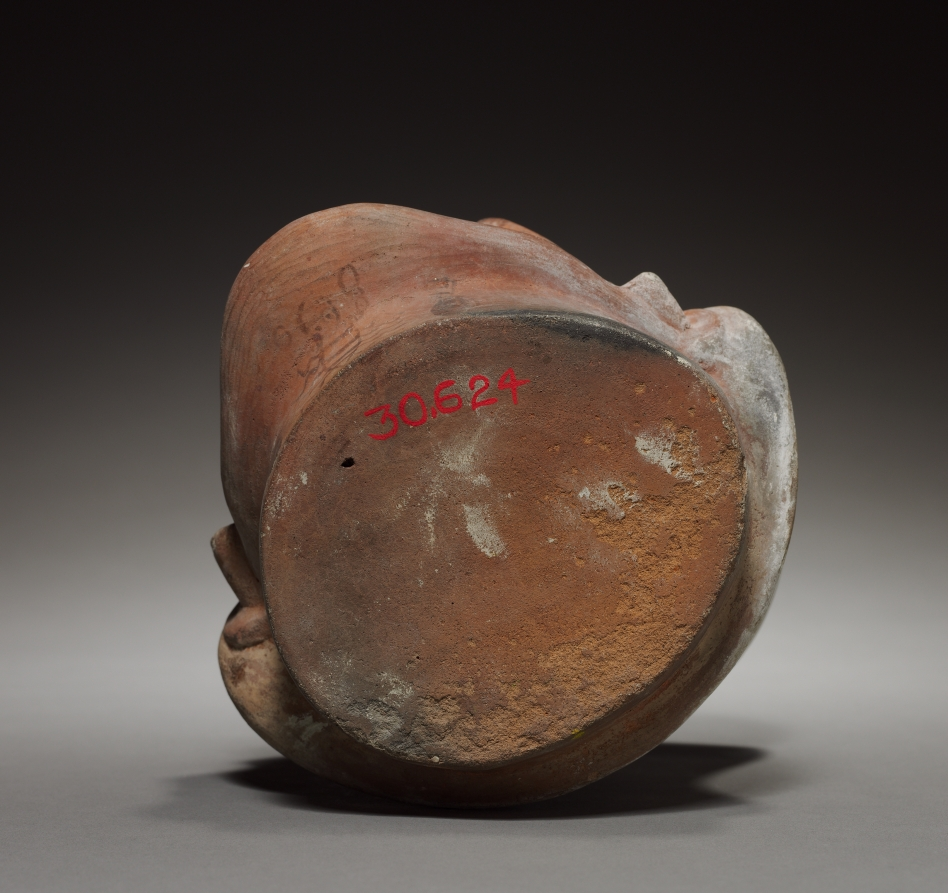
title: Vase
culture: Peru, Mochica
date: before 1930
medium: pottery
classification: Ceramic